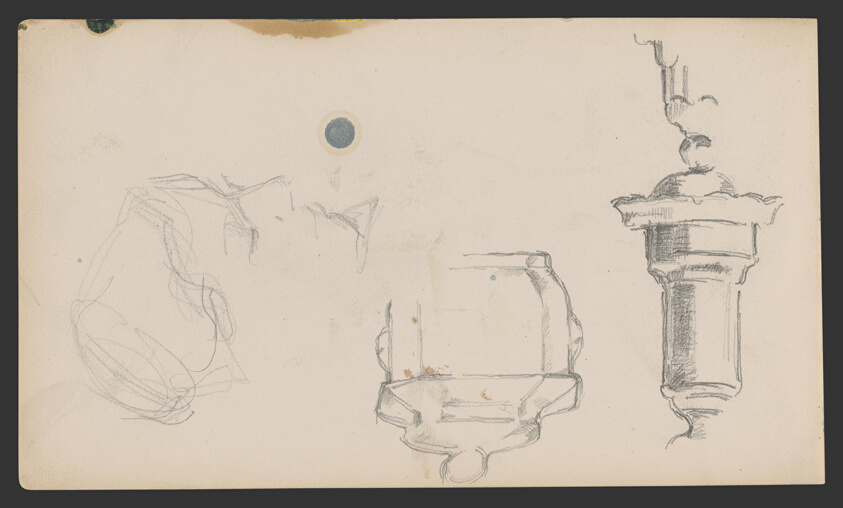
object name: Drawing and Watercolor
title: Sketchbook No. 2 (L'Estaque)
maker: Paul Cézanne; French, 1839-1906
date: 1875–86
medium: Graphite and pen and ink drawings on paper, bound into a book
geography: France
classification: sketchbook; graphite; prints and drawing; paper